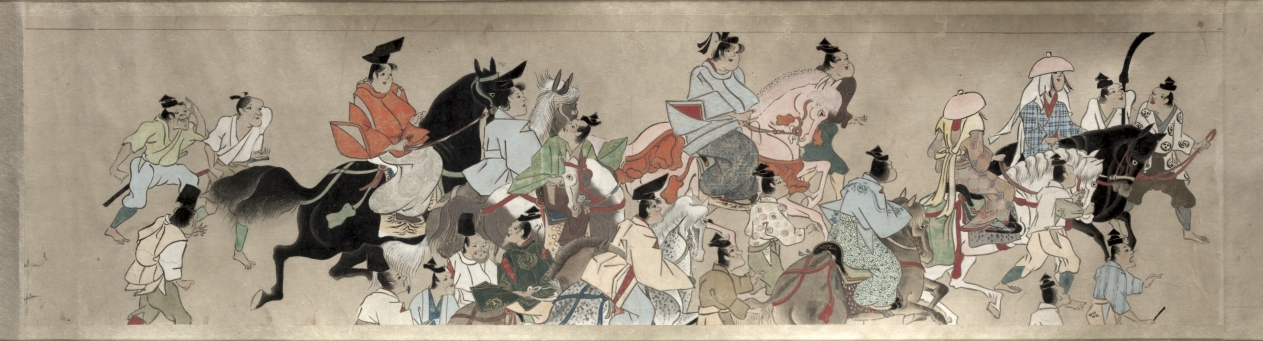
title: The Saltmaker's Story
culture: Japan, Edo period (1615–1868)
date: early 1600s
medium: One of a pair of handscrolls; ink, color, and gold on paper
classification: Painting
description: Once read and copied by girls at New Year’s celebrations and included in dowries, The Saltmaker’s Story is a rags-to-riches tale in which daughters are gifts from the gods. Despite his simple outlook, the main character progresses from humble roots as an associate at Kashima Shrine to the elite status of grandfather of the emperor through the intervention of the Kashima deity. The Saltmaker’s Story is traditionally presented in a set of three scrolls, but the text of this set has been removed by a previous owner, who remounted the illustrations as a pair. The paintings of this one take us from right to left through the second half of the tale.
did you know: This handscroll originally had texts before its paintings, but the texts were removed.